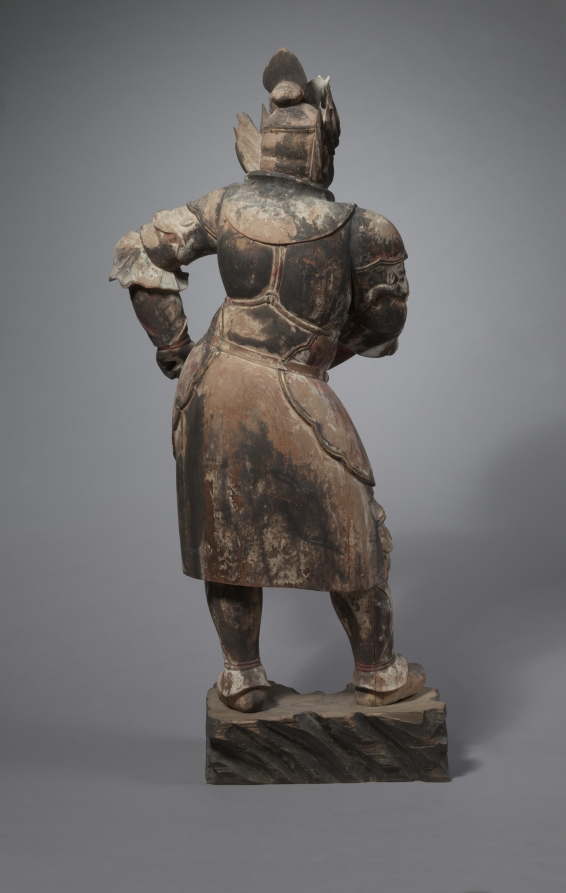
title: A Heavenly General (One of the Junishinshō)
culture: Japan, Kamakura period (1185–1333)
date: 1200s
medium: Wood with lacquer, color, gold, and crystal eyes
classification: Sculpture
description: This dynamic figure was originally part of a set of Twelve Divine Generals (Junishinshō) that stood in a Japanese Buddhist temple hall, protecting the central icon of Yakushi Nyorai, the Healing Buddha. This sculpture was constructed from many pieces of thinly carved wood joined together with pins, then covered with hemp cloth and lacquer paste, and finally decorated with pigments. Eyes made of crystal, with painted details, finish the composition. The proliferation of religious sites throughout Japan in the 1200s, particularly in Kyoto, kept sculptors’ studios busy creating religious icons.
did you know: A fierce facial expression warns us not to cross this protective deity.